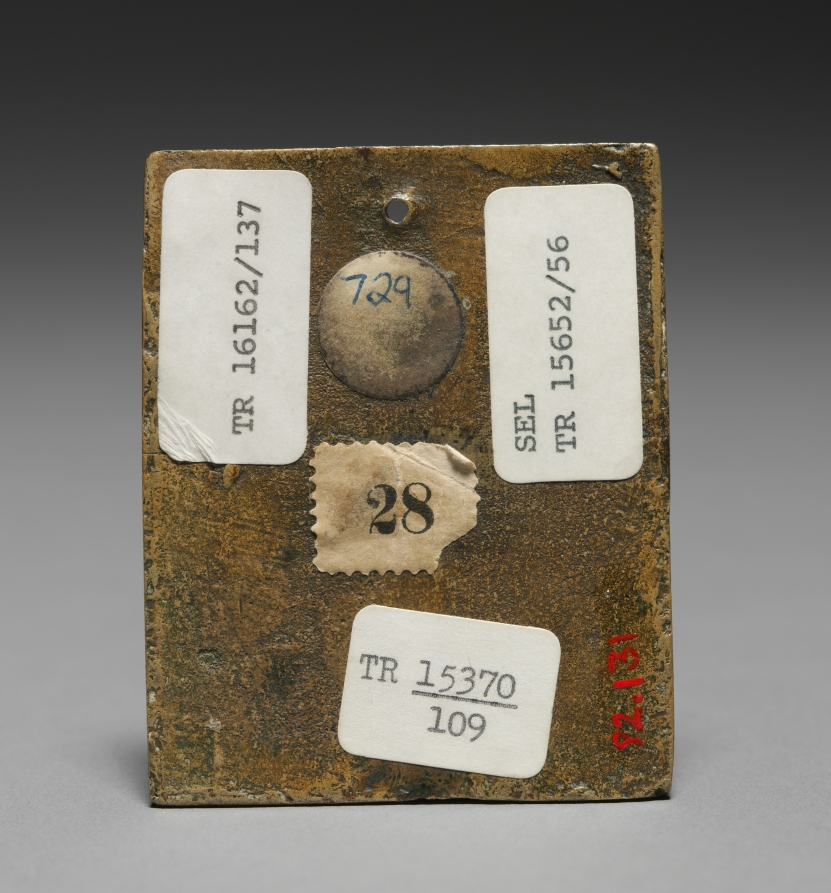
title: David Triumphant over Goliath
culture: Italy, late 15th-early 16th Century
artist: Moderno (Italian, 1467–1528)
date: late 1400s - early 1500s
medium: bronze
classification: Sculpture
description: A triumphant David, clad only in his helmet, stands next to the body of his opponent, the Philistine giant Goliath. David holds the sling that incapacitated the giant, allowing him to seize Goliath's sword and sever his head. On the right, a figure, possibly David's friend Jonathan, holds Goliath's body, while his severed head rests at David's feet. As his pseudonym may indicate, Moderno operated at the forefront of the classical revival in the early 1500s. David's body especially owes much to the classical tradition, with heroic frontal nudity that recalls ancient sculptures of ideal youths. The distinct lack of ornament, and the bold use of empty space characterize Moderno's style, where, instead of simply recreating classical prototypes, he reinterpreted and shifted them to produce dramatic compositions.